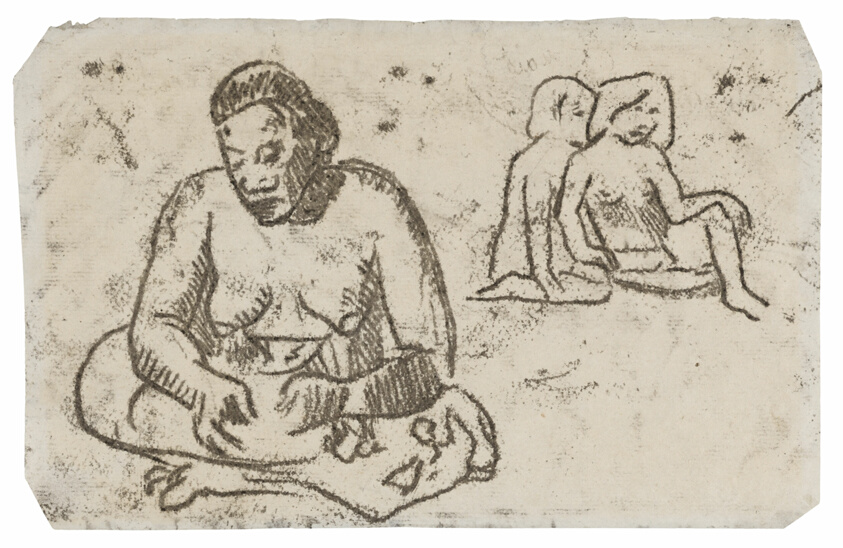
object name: Drawing and Watercolor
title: Seated Female (related to the painting Sister of Charity)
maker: Paul Gauguin (French, 1848-1903)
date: c. 1902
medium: Transfer drawing in black ink on ivory wove paper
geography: France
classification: drawings (visual works); prints and drawing